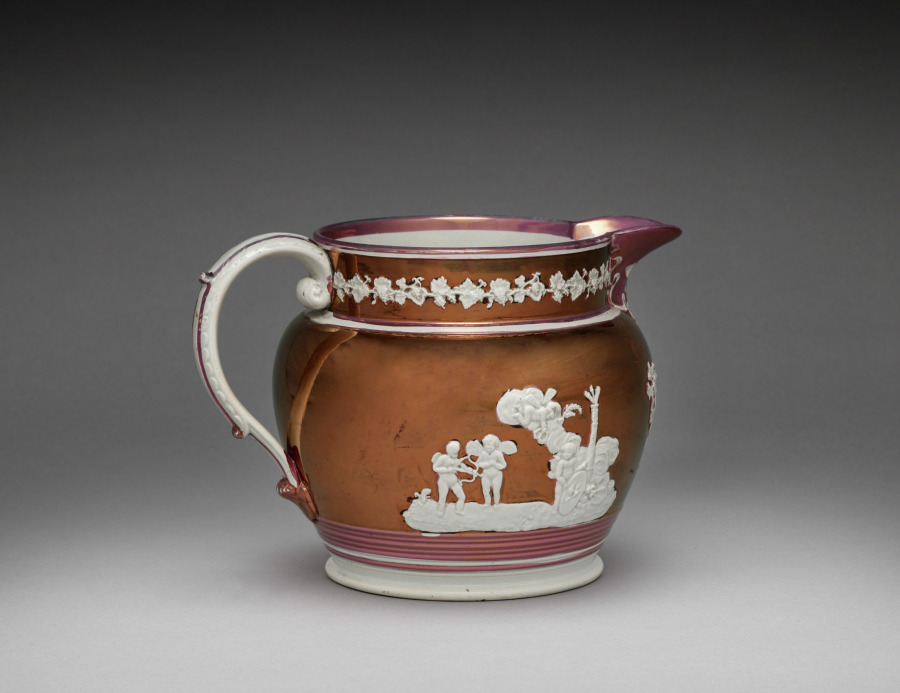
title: Pitcher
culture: England, Staffordshire, 18th century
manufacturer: Staffordshire Factory (British)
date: late 1700s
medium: lusterware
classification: Ceramic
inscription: engraved in script letters on body of pitcher directly under the lip: "T. C. Gibbs."